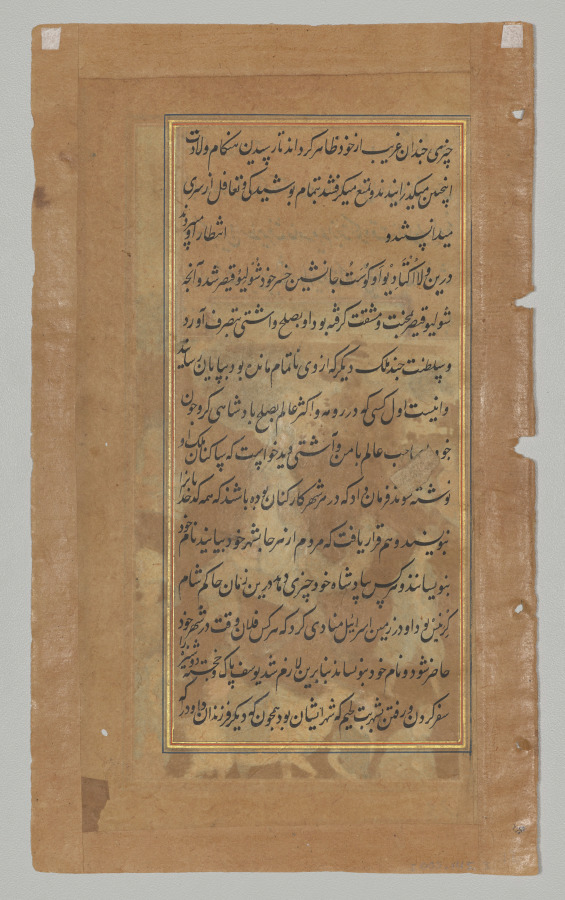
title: Text page from a Mirror of Holiness (Mir’at al-quds) of Father Jerome Xavier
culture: Mughal India, Allahabad, made for Prince Salim (1569–1627)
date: 1602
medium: Ink and gold on paper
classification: Manuscript